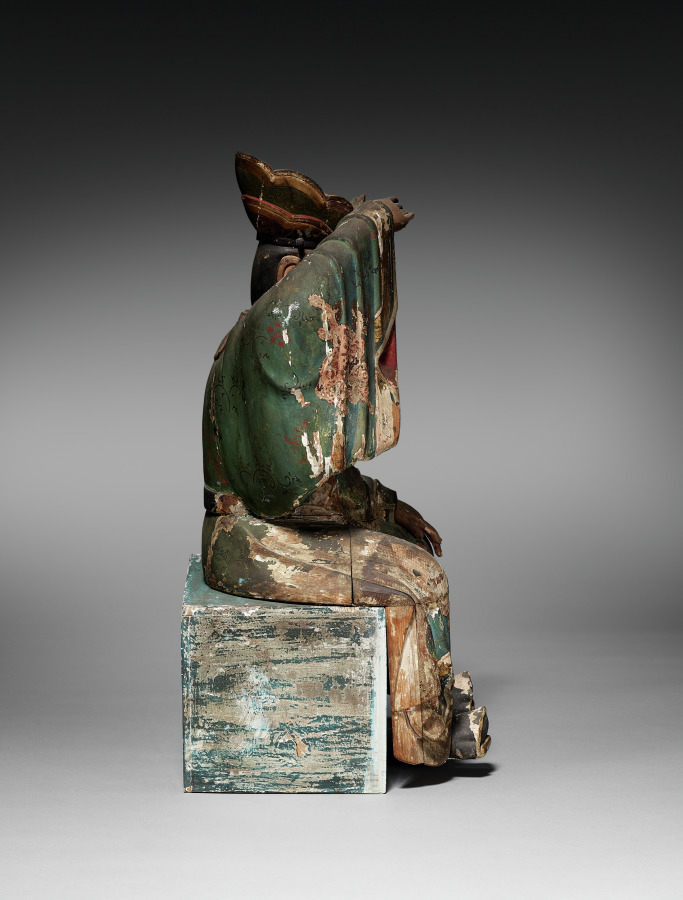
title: A King of Hell?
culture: Japan, Edo period (1615–1868)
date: c. 1800s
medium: wood, gesso, pigment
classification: Wood